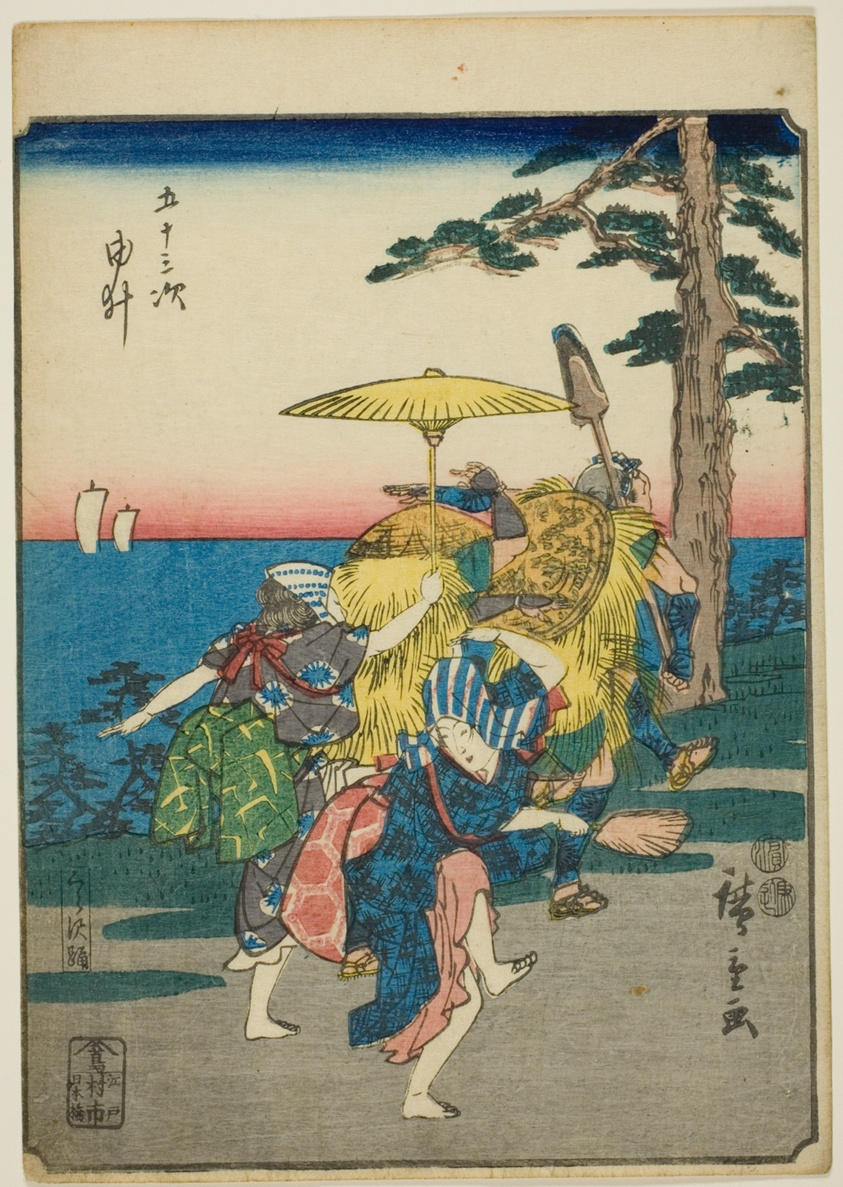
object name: Print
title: Yui, from the series "Fifty-three Stations [of the Tokaido] (Gojusan tsugi)," also known as the Figure Tokaido (Jinbutsu Tokaido)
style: Japanese (culture or style)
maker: Utagawa Hiroshige 歌川 広重; Japanese, 1797-1858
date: 1852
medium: Color woodblock print; chuban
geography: Japan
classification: woodblock print; print